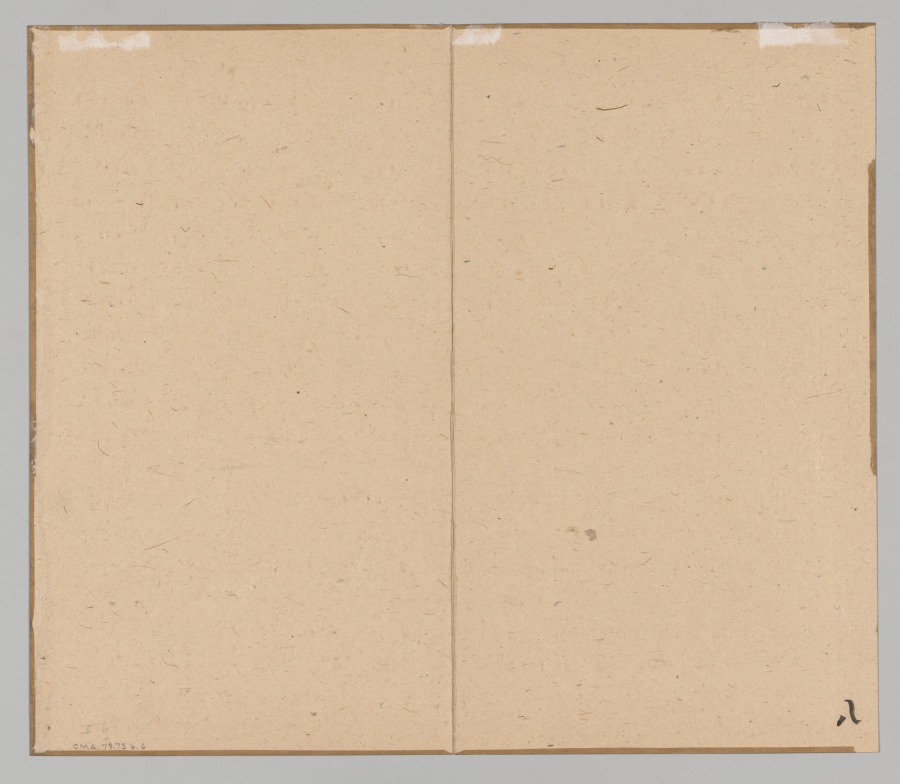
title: Reverberations of Taiga, Volume 2 (leaf 6)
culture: Japan, Edo period (1615–1868)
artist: Aoki Shukuya (Japanese, d. 1802)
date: mid- to late 1700s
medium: double-leaf from a pair of albums; ink and light color on paper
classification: Portfolio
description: Traditionally, young painters in Japan began their studies with an established master-painter. The master's compositions invariably became models that the apprentice copied to learn various ink and brush techniques. Shukuya was a pupil of the famous Kyoto artist Ikeno Taiga, whose style is reflected in these sketches of rocks, trees, and mountains.